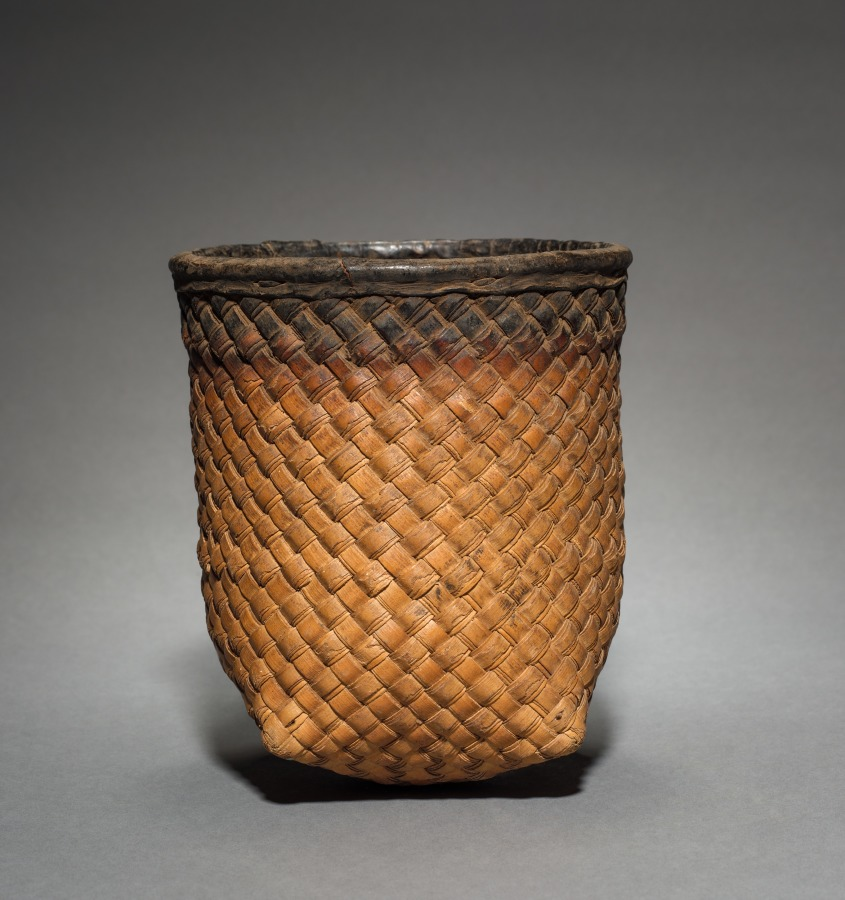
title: One of Ten Nesting Wedding Baskets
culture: Africa, Western Sudan, Burkina Faso, Lobi, 20th century (?)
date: c 1900s ?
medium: Plant fiber and leather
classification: Vessels